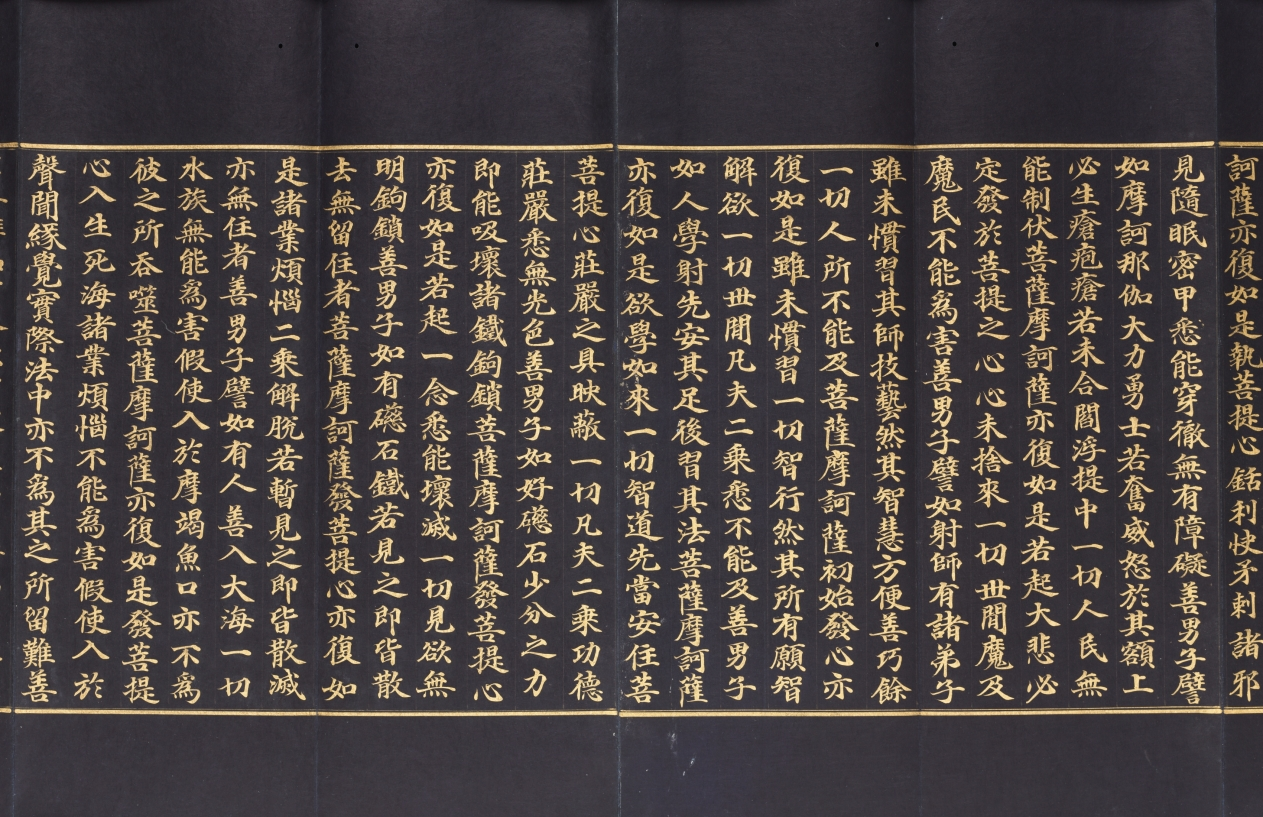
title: Avatamsaka Sutra No. 78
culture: Korea, Goryeo dynasty (918–1392)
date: 1300s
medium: Folded book with illustrated frontispiece; gold and silver on mulberry paper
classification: Bound Volume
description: This illuminated manuscript presents one part of the multivolume sacred text titled Avatamsaka (Flower Garland) sutra. Both the script and the image are rendered in gold ink on the smooth surface of the dark blue, indigo-dyed mulberry paper. This portion of the text, which reads from right to left, describes the encounter of the Buddha of the Future (Maitreya) and the young pilgrim Sudhana. The Buddha gives his words of wisdom to Sudhana, who asks questions about the path toward spiritual awakening. Mixed with ink and glue, the gold has a brilliance that strikingly reflects Sudhana’s ardent quest for understanding the way to reach enlightenment.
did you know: The pristine condition of this manuscript indicates that it was rarely used after its creation, revealing that the act of making a manuscript rather than reading it was the main religious goal.